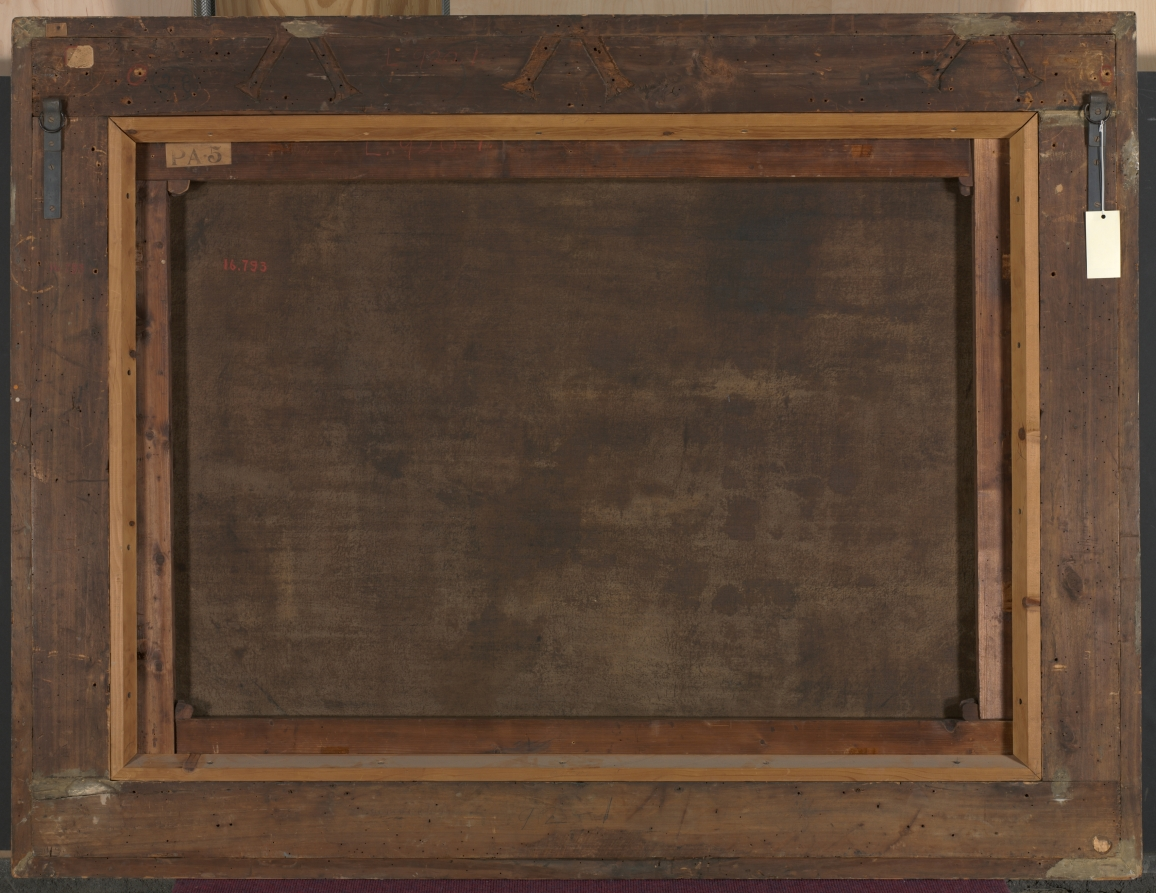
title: Portrait of a Couple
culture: Northern Italy, late 16th century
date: c. 1580–88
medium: oil on canvas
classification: Painting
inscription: inscribed upper left: AETA, SVAE, ANNO. XXXV, upper right: AETA. SVAE. ANNO. XXVIII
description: While the attribution remains hotly debated, this work exemplifies how Italian portraiture of the 1500s could articulate family alliances through marriage. The inscription gives the sitters’ ages as 35 and 28, and their elaborate jewelry, weapons, and garments, made of expensive materials, convey their elite status. The marten skin attached to the woman’s waist-its head decorated with gems-symbolized propriety. These expressions of wealth convey achievements and position rather than accurate personalities, and the figures, though lifelike, stand in awkward relationship to each other, their interaction one of alliance not love.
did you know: The bejeweled martin (weasel) was a coveted fashion accessory in Renaissance Europe.